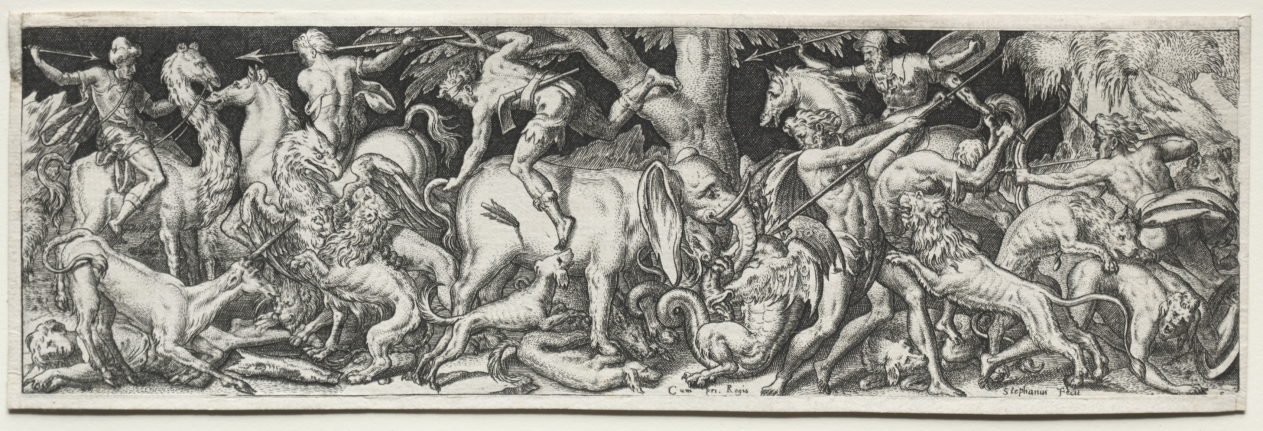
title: Combats and Triumphs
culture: France, 16th century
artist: Etienne Delaune (French, 1518/19-c. 1583)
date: c. 1550–72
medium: engraving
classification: Print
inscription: lower center, in plate: Cum pri. Regis ; lower right, in plate: Stephanus Fecit ; lower right, in plate: S ; verso, lower right, in graphite: 286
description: Etienne Delaune (French, 1518/19-1583) Combats and Triumphs, probably 1560s Engravings Gift of Leonard C. Hanna 1924.671-.674 The Triumph of Bacchus Battle of Men and Animals Combat of the Naked Men Battle of the Centaurs and the Lapiths The four prints shown here come from a series of twelve known as the Combats and Triumphs. The friezelike composition reflects the artist's study of marble relief carvings on Greek and Roman sarcophagi (coffins), here reduced to a preciously small setting. Against a flat, stagelike background, Delaune's balletic warriors engage in a Mannerist version of artificial war. Etienne Delaune was inspired by the art created at Fontainebleau, but he worked in Paris and then Strasbourg during the late 1500s. His small, exquisitely executed engravings reflect his training as a goldsmith and his work as a medallist.